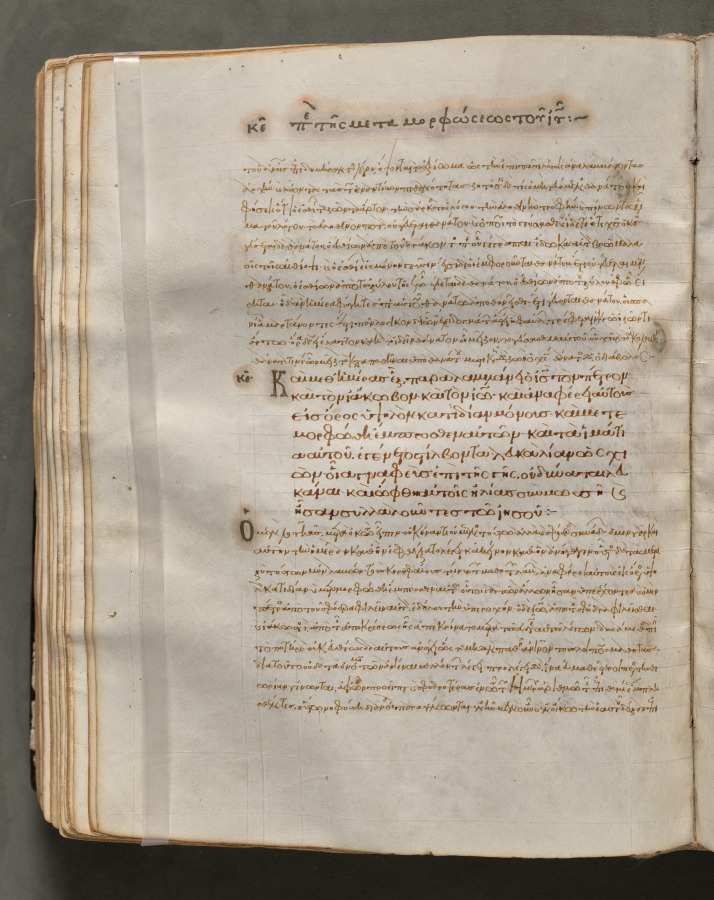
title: Text, folio 161 (verso), from a Gospel Book with Commentaries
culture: Byzantium, Constantinople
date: c. 1000–1100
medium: ink, tempera, and gold on vellum; leather binding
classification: Bound Volume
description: Each of the four gospels in this book opens on a page with brilliantly illuminated borders depicting the author of the text as well as birds-principally peacocks, symbols of the immortality of the soul-and fountains, representing the fountain of life and the salvation of the soul. This volume consists of 428 leaves with texts in Greek. Its level of sophistication suggests that it was probably written and decorated in a monastery in Constantinople.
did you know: Gospel Books were carried in procession through Byzantine churches.